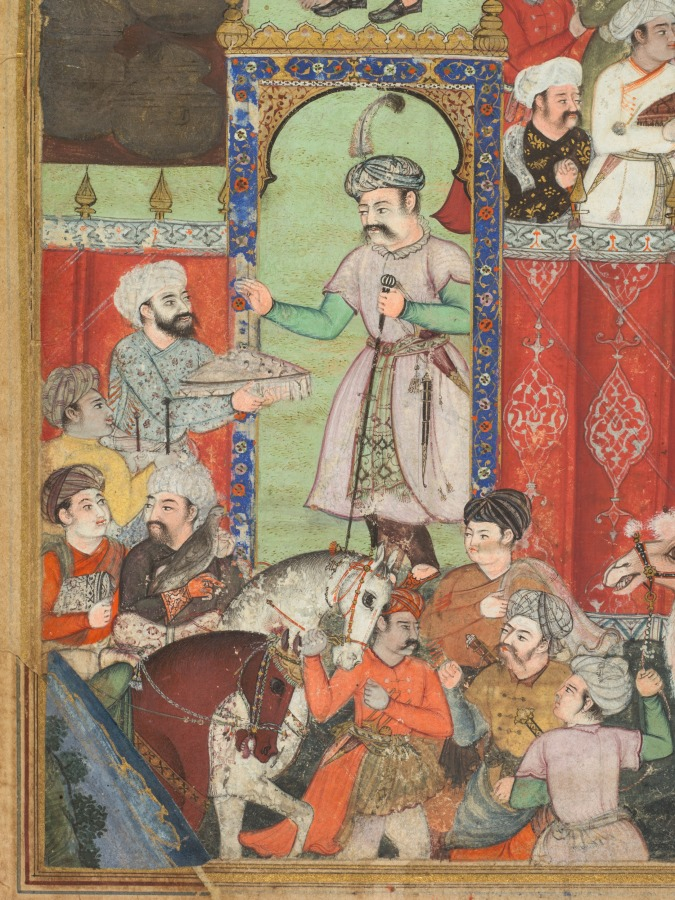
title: A feast for Babur hosted by his half-brother Jahangir Mirza in Ghazni in May 1505, from a Babur-nama (Memoirs of Babur)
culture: India, Mughal, 16th century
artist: Basavana (Indian, active c. 1560–1600)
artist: and Madhav Khurd (Indian, active late 1500s)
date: c. 1589; outer margins added c. mid-1900s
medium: Gum tempera and gold on paper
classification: Painting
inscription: verso: Persian text, in nasta‘liq script: . . . presented many gifts. In that year most of the rivers had become very swollen, to the extent that the Dih-i Ya‘qub River could not be forded. I brought the boat I had made at the lake and floated it in the waters of Dih-i Ya‘qub opposite Kamri and all the people crossed by boat. For this reason we went through the Sajavand pass and straight through crossing the river at Kamri by boat. We arrived at Kabul in the month of Dh’ul-Hijja [May 1505]. A few days earlier, Sayyid Yusuf Beyg had died of colic. At Kush Gunbad, Nasir Mirza had requested leave and remained behind to get provisions for his retinue from his own domain, saying he would follow in two or three days. Once he had left us he sent his entire army to the Nur valley on account of a minor act of disobedience by the people of the Nur valley. [Given] its rice fields and the location of its citadel on the peak of the mountain as . . .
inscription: recto: Persian inscription in bottom margin, in nasta‘liq script: the work of Basavana / [ . . . ] / Madhav Khurd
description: Twenty-one years before his conquest of Delhi, Babur took control of territories in Afghanistan, including the cities of Kabul and Ghazni. His half-brother, who controlled the region around Ghazni, ordered that a party be thrown in honor of Babur’s arrival from the north. Drinking parties and feasts in lavish movable tent settings, where gifts were exchanged, alliances forged, and relationships cemented, were as important to the building of the empire as the battles.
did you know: A manager directs servers to bring spoons and lay out the buffet table.